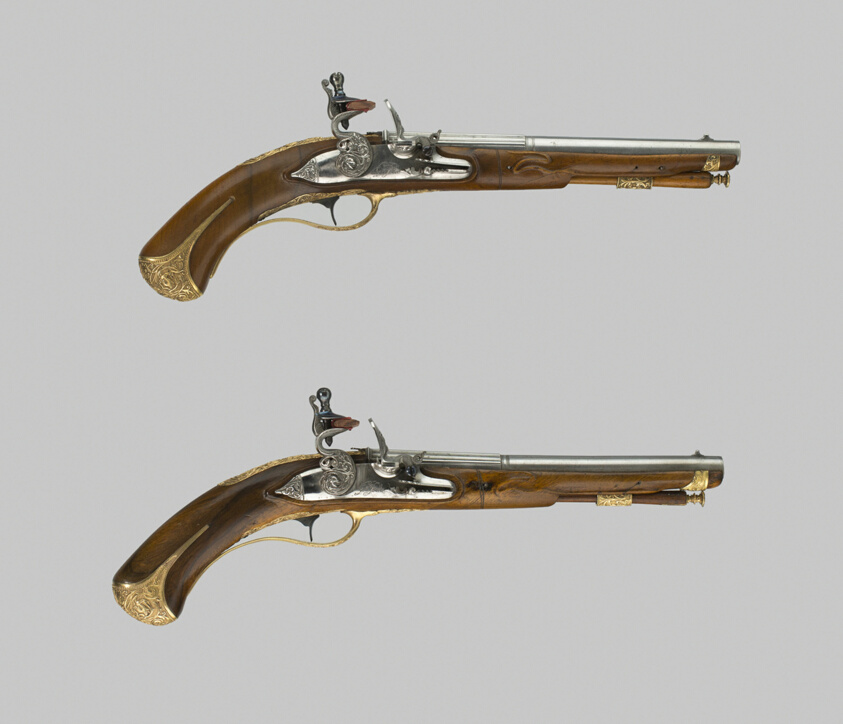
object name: Arms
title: Pair of Flintlock Pistols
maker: Barrels signed Lazzarino Cominazzo; Italian, Brescia, act. 1685—1729; Locks signed Giovanni Botti; Italian, Brescia, act. 1685—1729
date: early 18th century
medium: Walnut and gilt brass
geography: Brescia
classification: firearm-handgun; arms; arms and armor